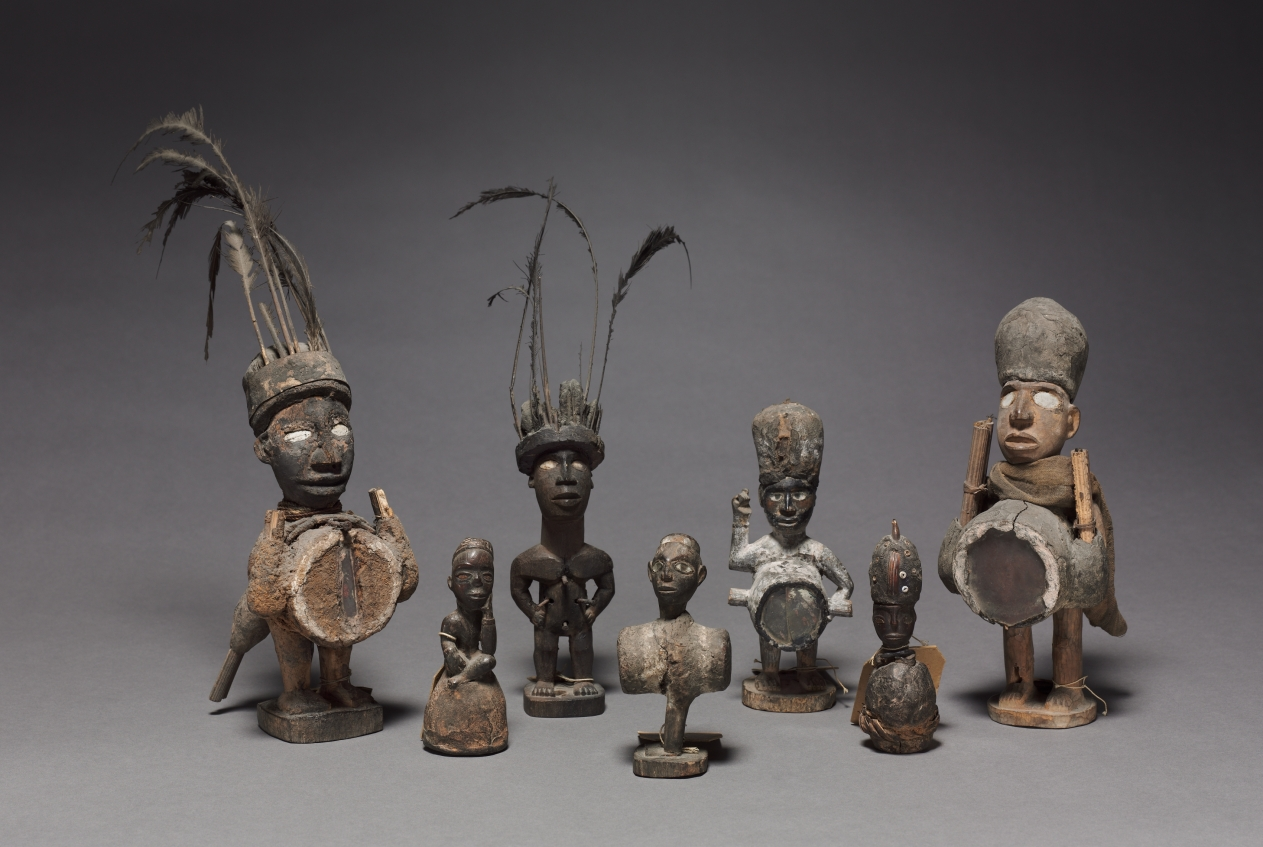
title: Power figure (nkisi)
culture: Africa, Central Africa, Republic of the Congo, Kongo-style maker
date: late 1800s–early 1900s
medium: Wood, organic materials (including resin), cloth, metalized glass, possibly porcelain, and plant fiber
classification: Sculpture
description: This figure is one of the two tallest of the seven anthropomorphic minkisi figurines previously in the Delenne collection. Identified as an nduda, two upward “guns” are attached on its side loaded with gunpowder used to shoot witches. Its label bears the word colique, a term referring to heavy pains caused by intestinal obstruction.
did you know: The object’s two small guns are pointing upward, but bears the label “colique,” a term referring to heavy pains caused by intestinal obstruction.